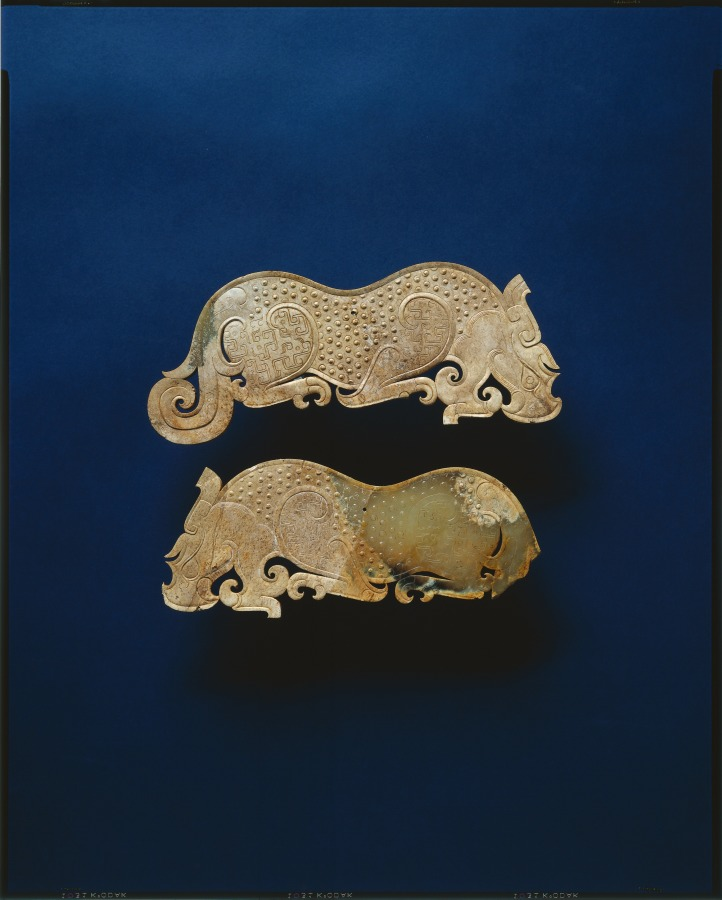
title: Pair of Jade Plaques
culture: China, Henan province, Eastern Zhou dynasty (770–256 BCE), Warring States period (475–221 BCE)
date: 475–221 BCE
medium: nephrite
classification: Jade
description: This beautiful pair of late Eastern Zhou openwork jade plaques illustrate a level of creativity and technical achievement that was unequaled before or since. Taking the shape of a pair of fantastic creatures, they are at once tiger-like, rhino-like, and dragon-like. Their strong silhouettes are marked with shallow relief bands, and their subtly swelling embellished surfaces are finished to the same degree on both sides.